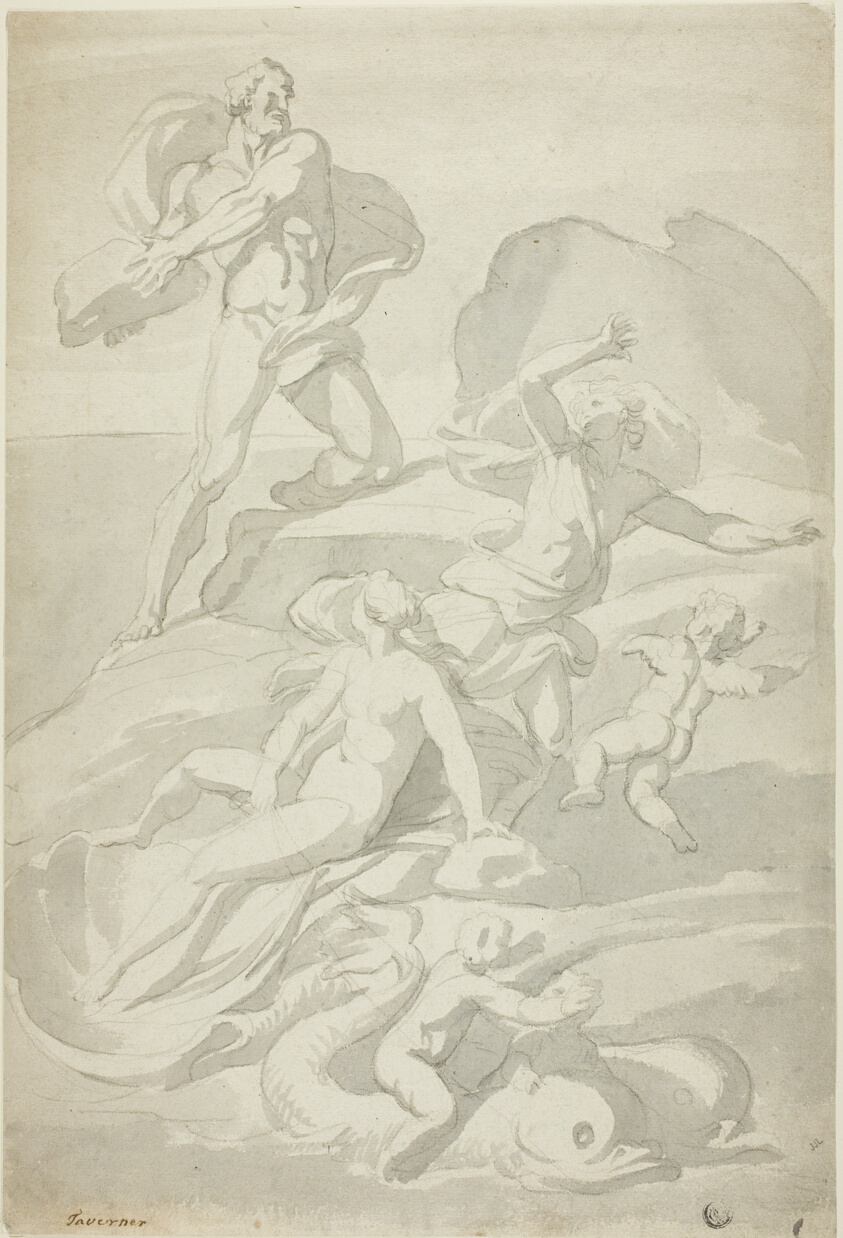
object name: Drawing and Watercolor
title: Polyphemus Throwing Boulder at Acis, with Galatea (recto), and Pholyphemus Lifting Boulder (verso)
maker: John William Taverner (English, 1703-1772)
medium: Black chalk, and brush and gray wash (recto), and black chalk, and brush and brown wash (verso), on ivory laid paper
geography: England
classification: chalk; drawings (visual works); prints and drawing